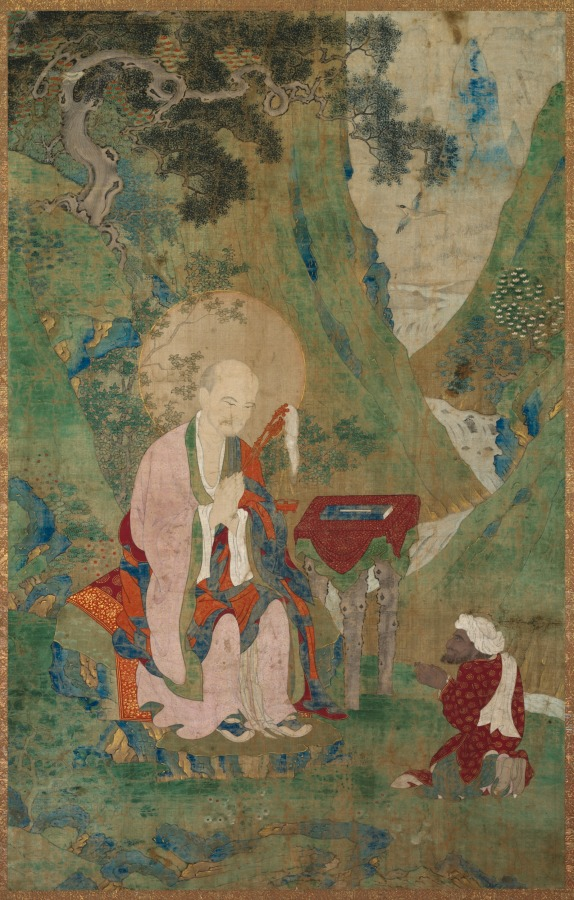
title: Lohan (Immortal)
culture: Tibet, Sino-Tibetan style, 17th century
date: 1600s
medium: ink and slight color on cotton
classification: Painting